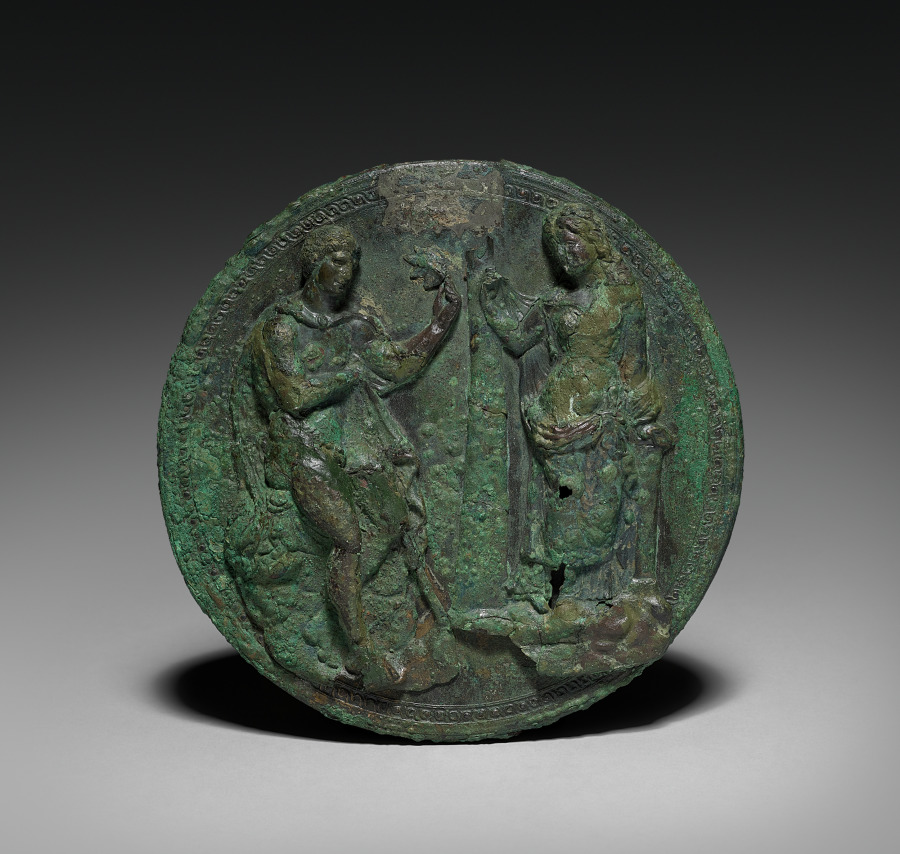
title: Mirror Case with Cover (lid)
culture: Greece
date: 300s BCE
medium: bronze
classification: Metalwork